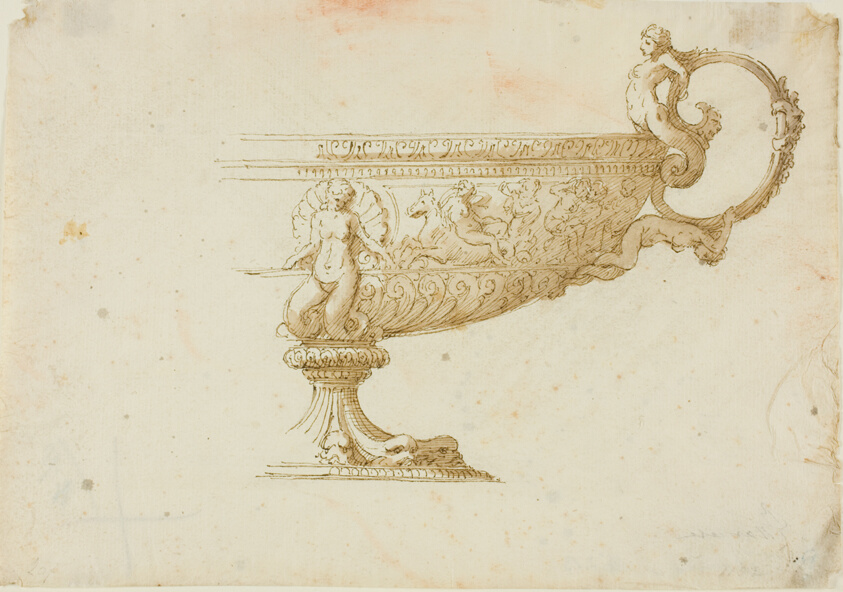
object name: Drawing and Watercolor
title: Partial Sketch of a Tazza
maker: Unknown Artist; Italian or French, 18th or 19th century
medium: Pen and brown ink, with brush and brown wash, on cream laid paper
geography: Italy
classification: pen and ink drawings; drawings (visual works); prints and drawing